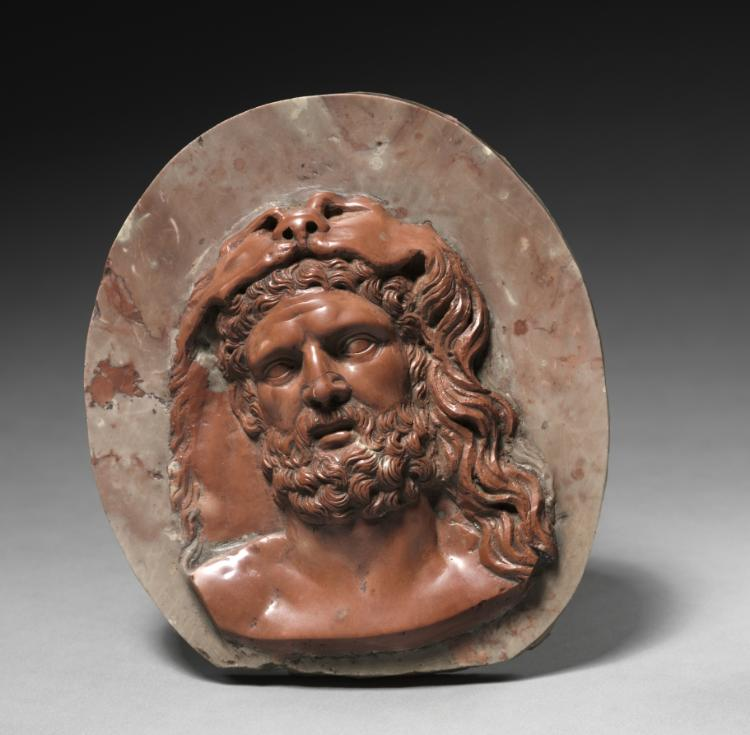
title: Hercules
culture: Italy, 16th century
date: 16th Century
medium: marble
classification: Sculpture